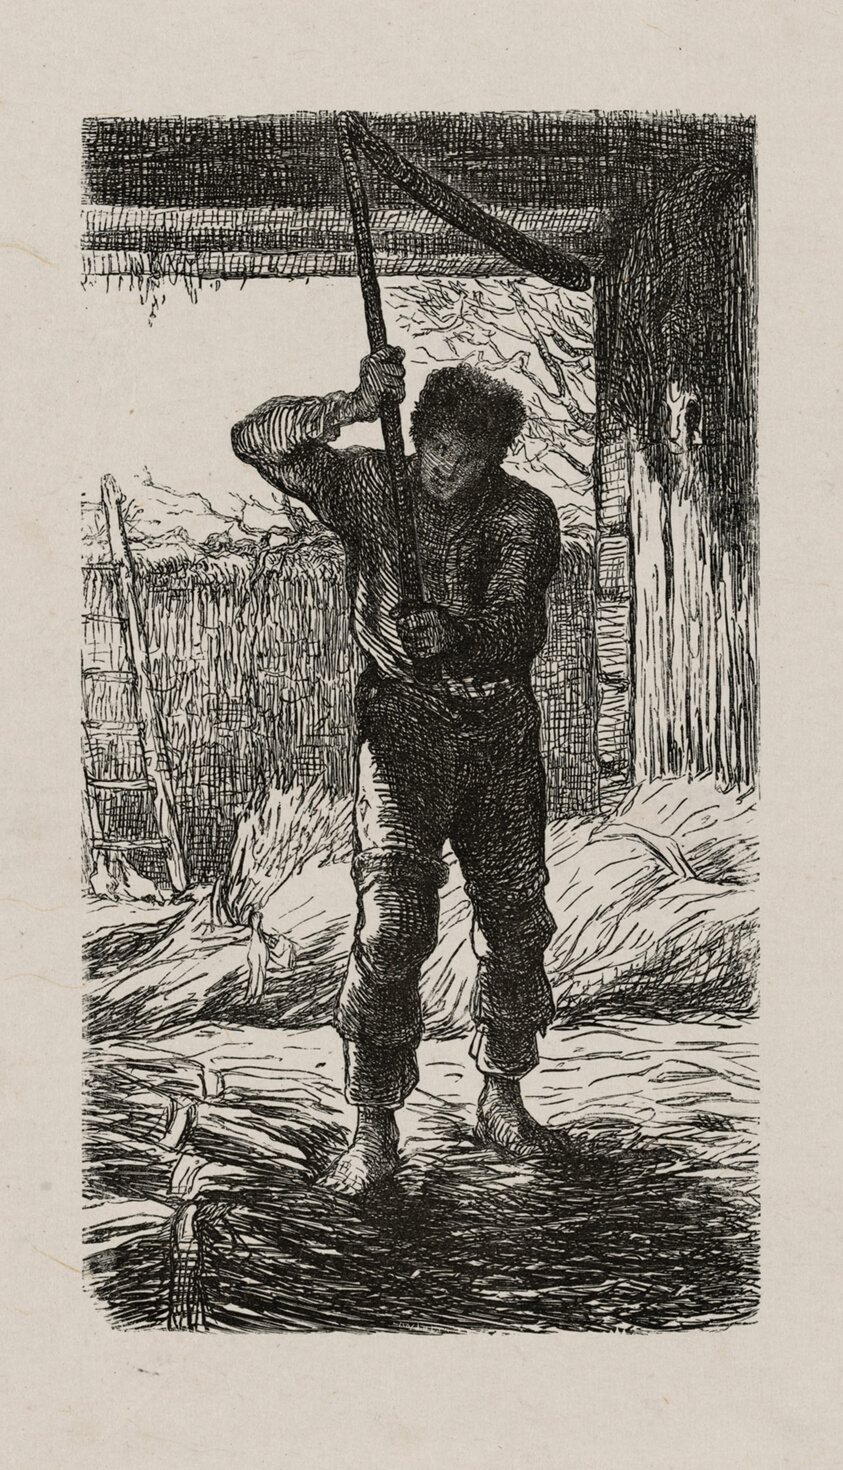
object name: Print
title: Thresher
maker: Jacques Adrien Lavieille (French, 1818-1862); after Jean François Millet (French, 1814-1875)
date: 1853, after drawing made in 1852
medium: Wood engraving in black on gray China paper, laid down on off-white wove paper (chine collé)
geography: France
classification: wood engraving; print; prints and drawing